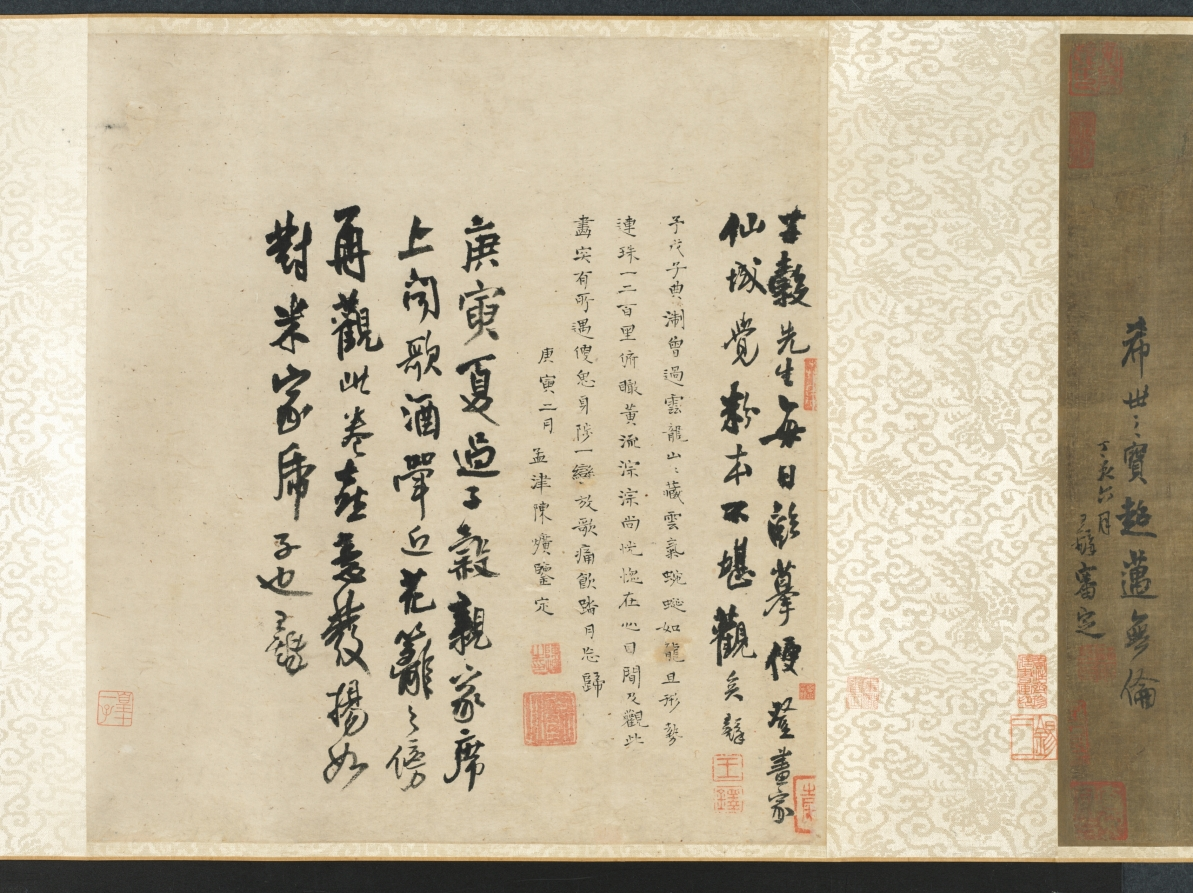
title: Cloudy Mountains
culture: China, Southern Song dynasty (1127-1279)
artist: Mi Youren (Chinese, 1072–1151)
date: 1130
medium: Handscroll; ink and color on silk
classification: Painting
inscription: 好山無數接天涯，烟靄陰晴日夕佳。/ 要識先生會到此，故留筆戲在君家。/ 庚戍歲，辟地新昌作。元暉。/ [seal] 元暉戲作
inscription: [Seal] 安陽孫氏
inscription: [Seal] 畢瀧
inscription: [Seal] 成親王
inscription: [Seal] 永瑆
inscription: [Seal] 錫三 appears twice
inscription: [Seal] 養性齋珍藏書畫印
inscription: [Seal] 芷陔審定真跡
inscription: [Seal] 玉簡齋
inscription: 2 colophons (1 dated 1650), inscription dated 1647, and 2 seals of Wang To (1592–1652)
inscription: 1 colophon, dated second month of the gengyin year 庚寅 (1650), and 2 seals of Chen Kuang 陳爌 (1646 jinshi degree)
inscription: 7 seals unidentified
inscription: A separate scroll containing six colophons on Cloudy Mountains exists; the inscribers are Luo Zhenyu 羅振玉 (1866–1940), Naito Torajiro 內藤虎次郎 (1866–1934), Nagao Ko 長尾甲 (1864–1942), and Wu Changshuo 吳昌碩 (1844–1927). Naito Torajiro alone wrote three colophons.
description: Cloudy Mountains captures the view of a lush and misty riverscape, an impression of Mi Youren’s new environment, painted in a moment of peace. With the fall of the Northern Song dynasty in 1127 upon the Jurchen’s military invasion, Mi Youren fled south across the Yangzi River. In 1130, he had reached Xinchang in Zhejiang province and thanked his host with this painting for having given him shelter. Mi Youren was the oldest son of the art critic Mi Fu (1051– 1107); both developed a distinct style of mountain scenery by accumulating wet ink dots that create a hazy atmosphere.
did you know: This scroll is one of the museum’s earliest dated Chinese paintings.